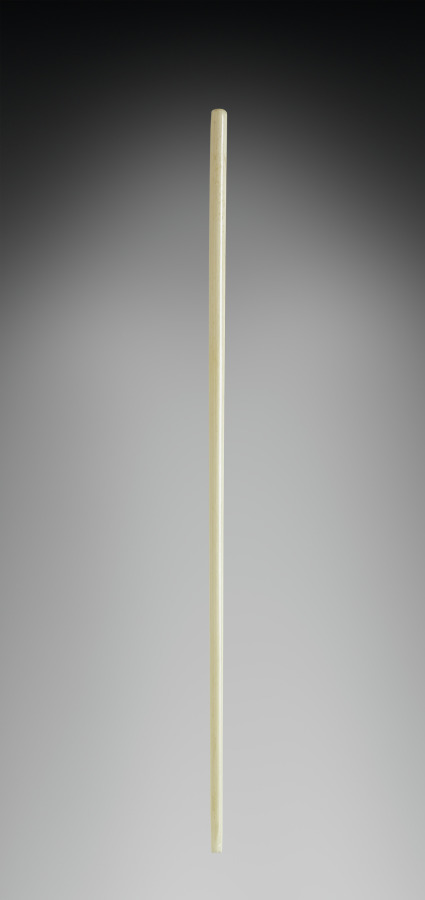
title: Chopstick for Kit with Chopsticks and Knife - Souvenir Trade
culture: Japan, Meiji period (1868–1912) to Taishō period (1912–26)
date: early 1900s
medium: enamel, wood, walrus ivory or bone, metal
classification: Implements